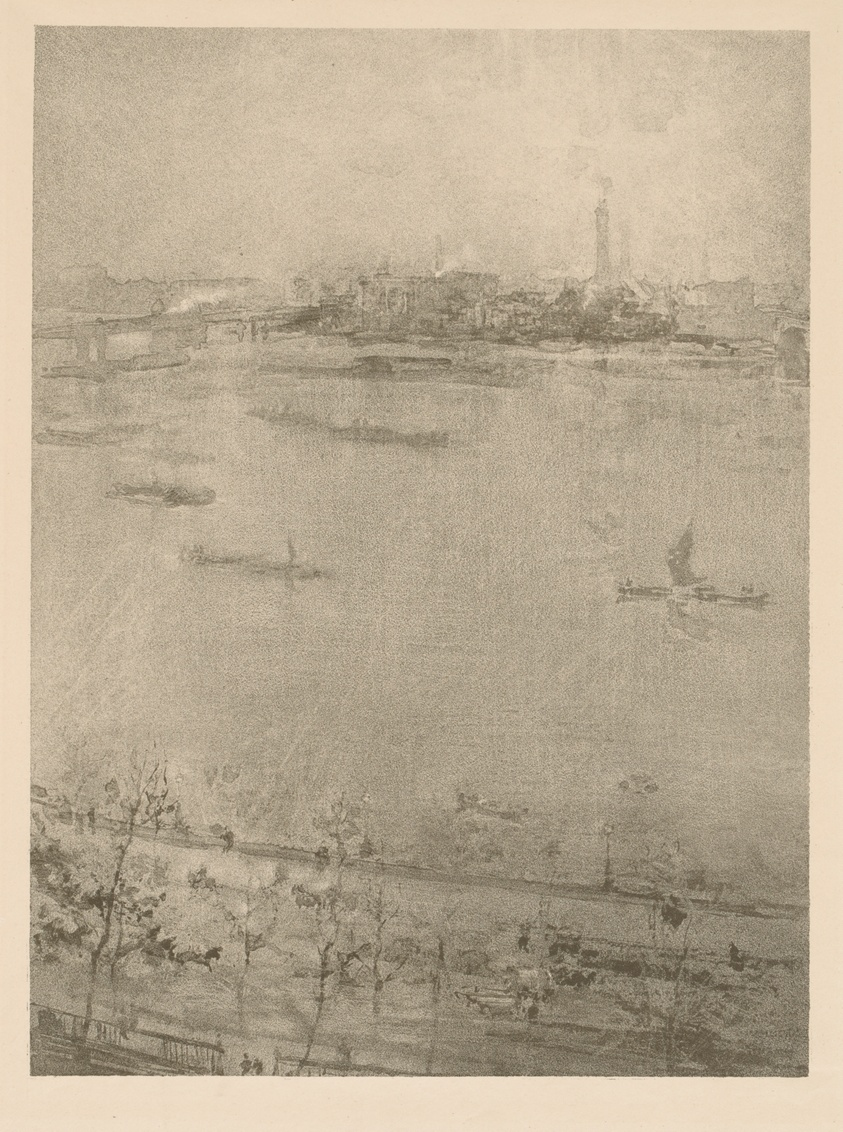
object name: Print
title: The Thames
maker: James McNeill Whistler (American, 1834-1903)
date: 1896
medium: Lithotint in black, with scraping on stone, on cream wove proofing paper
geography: United States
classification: lithotint; lithograph; print; prints and drawing; paper